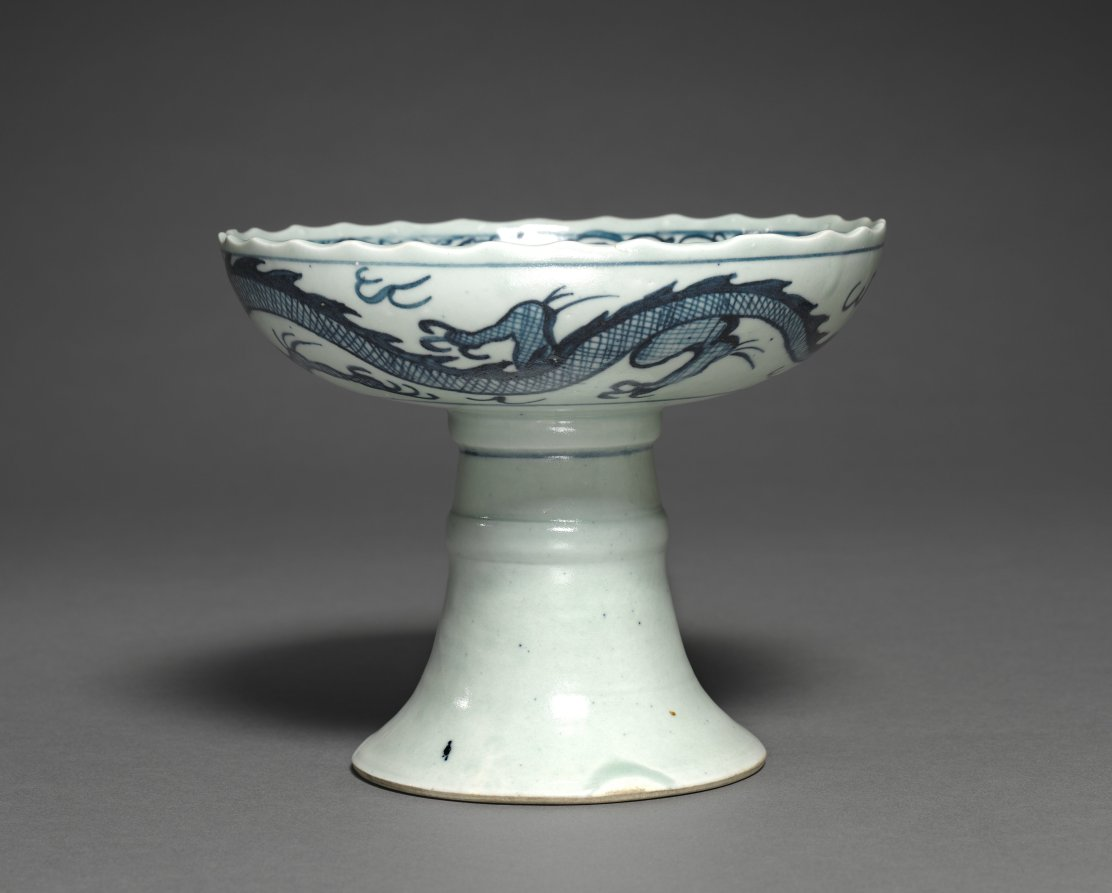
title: Stem Cup with Dragon Decoration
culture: Vietnam (Annam)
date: 1300s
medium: porcelain with underglaze blue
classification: Ceramic